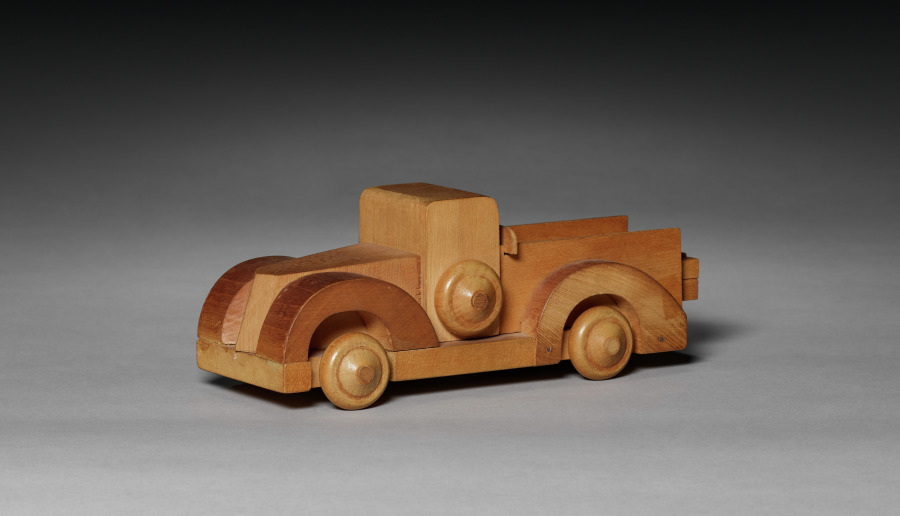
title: Boysen Toys (truck)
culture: Denmark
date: 1900s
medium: Wood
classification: Wood